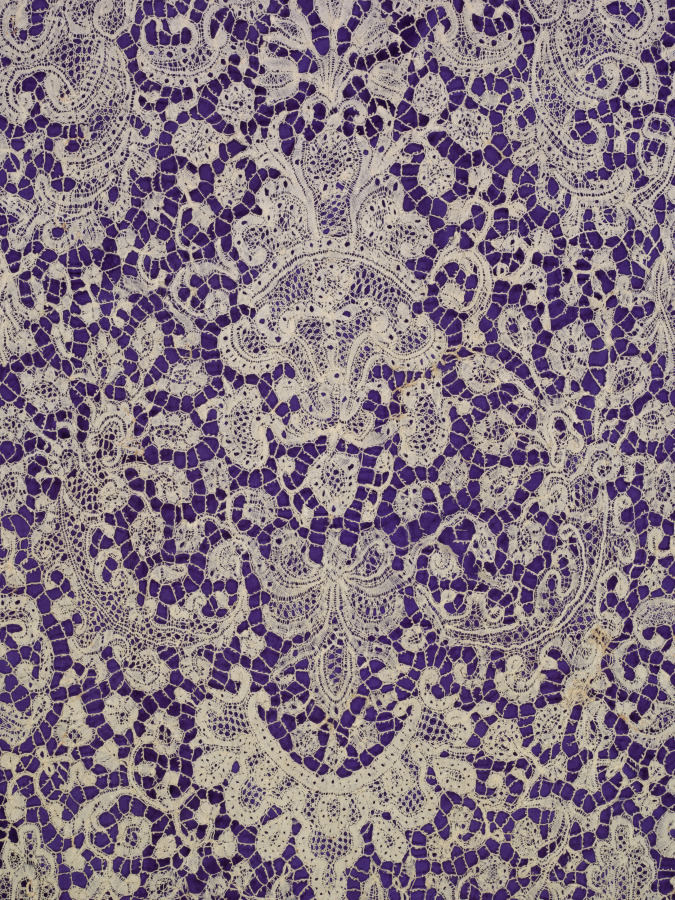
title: Alb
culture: Spain: embroidered linen; Flanders: bobbin lace (Point d’Angleterre) flounce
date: Embroidered Linen: 1600s; Bobbin Lace (Point d’Angleterre) Flounce: 1700s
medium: Plain weave linen embroidered in gold and silver; linen bobbin lace (Point d’Angleterre a Reseau)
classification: Garment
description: This beautiful vestment, called an alb, was worn under other liturgical garments by the clergy who served at the altar. Embroidered with gilt-metal thread flora on a linen ground, it is trimmed with a flounce and cuffs of lace, the most fashionable and expensive material at the time. Its purple silk lining indicates that it belonged to an archbishop. The exquisitely worked bobbin lace consists of two large composite floral designs flanked by popular curved forms on an elaborate bar ground that repeats ten times around the flounce.